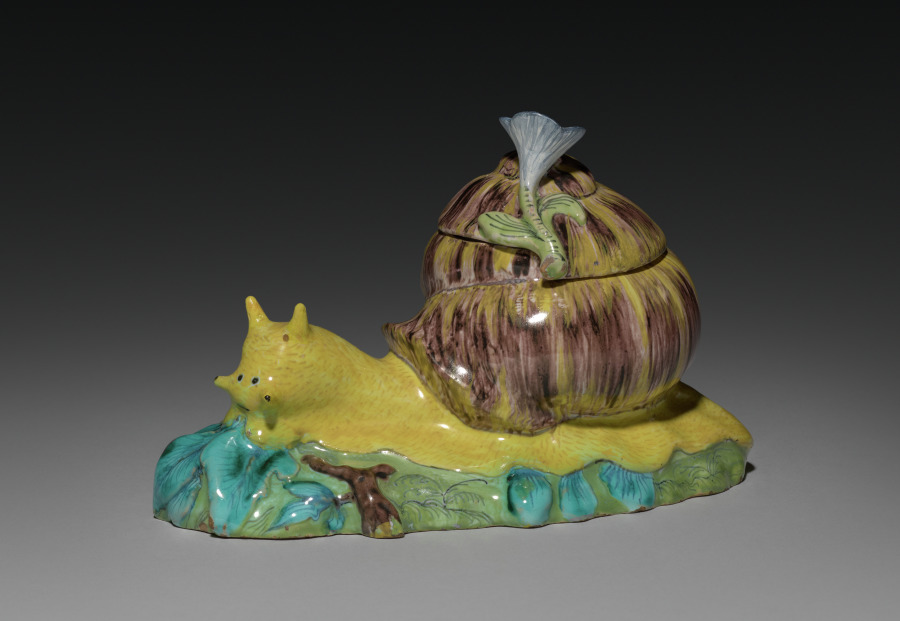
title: Covered Box in the Form of a Snail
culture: France, 18th century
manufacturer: Strasbourg Factory (France)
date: c. 1750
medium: faience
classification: Ceramic